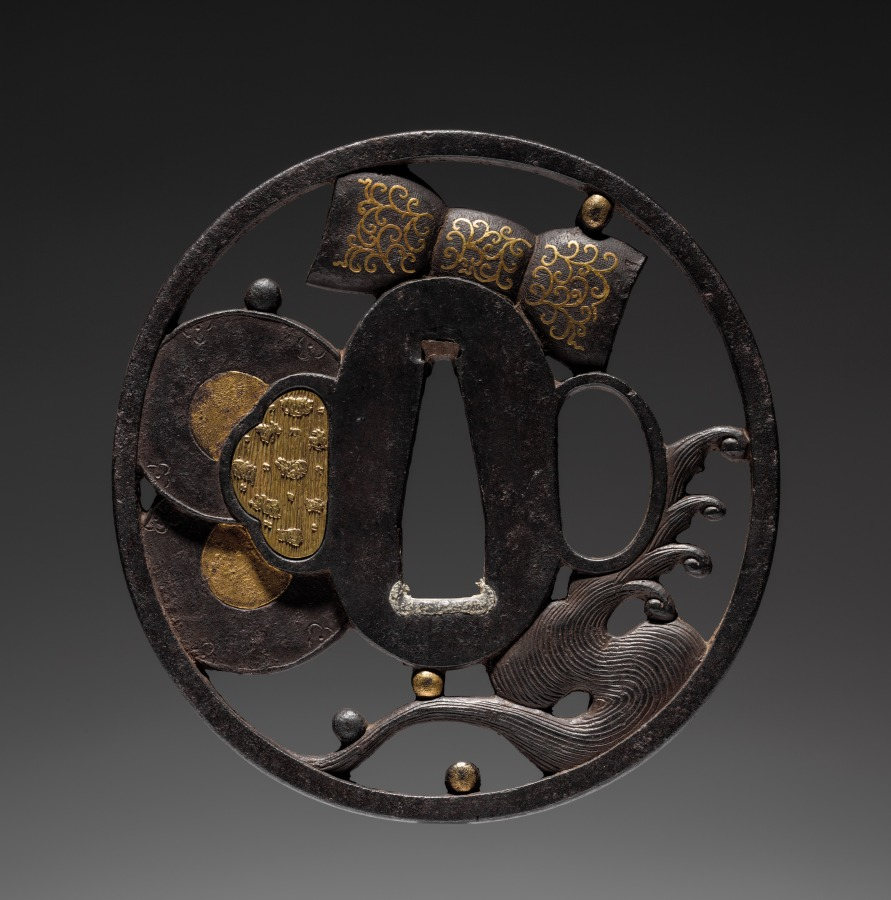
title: Sword Guard (Tsuba) with Drum in Waves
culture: Japan, possibly Edo period (1615-1868)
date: c. 1615–1868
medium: iron with gold inlay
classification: Arms and Armor